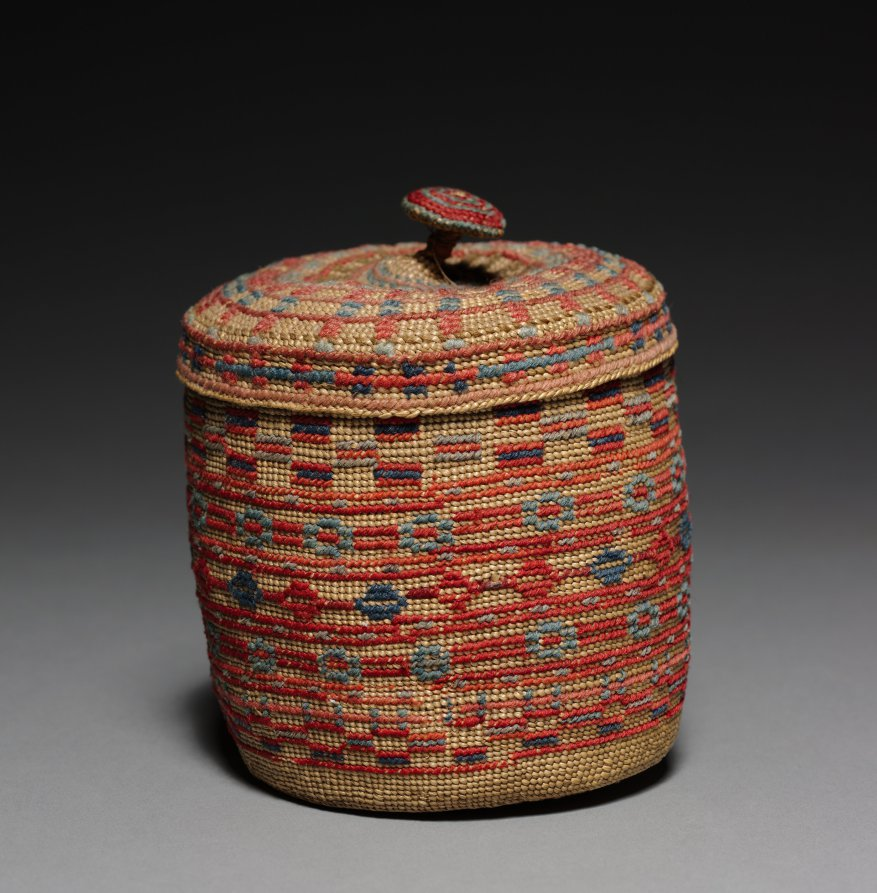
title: Covered Basket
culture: Arctic, Aleut, late 19th-early 20th century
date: late 1800s–early 1900s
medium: wool embroidery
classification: Basketry